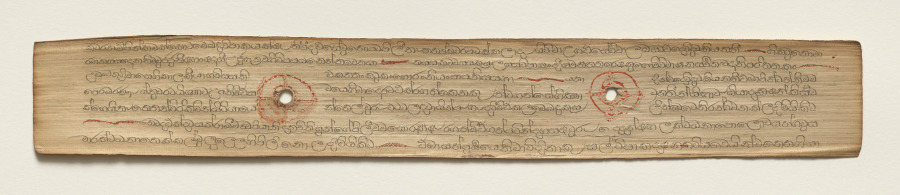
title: Leaf from a Buddhist Manuscript (verso)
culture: Sri Lanka, Singhalese, Late 17th century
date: c. 1700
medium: fiber paper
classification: Manuscript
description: Palm leaf material is still used for manuscripts in Sri Lanka. The palm leaves are prepared first by boiling them, drying them in the sun, and then rubbing them with oils. Scribes then use a metal stylus to incise the text. Then charcoal powder is wiped across the pages, filling in only the inscribed lines.